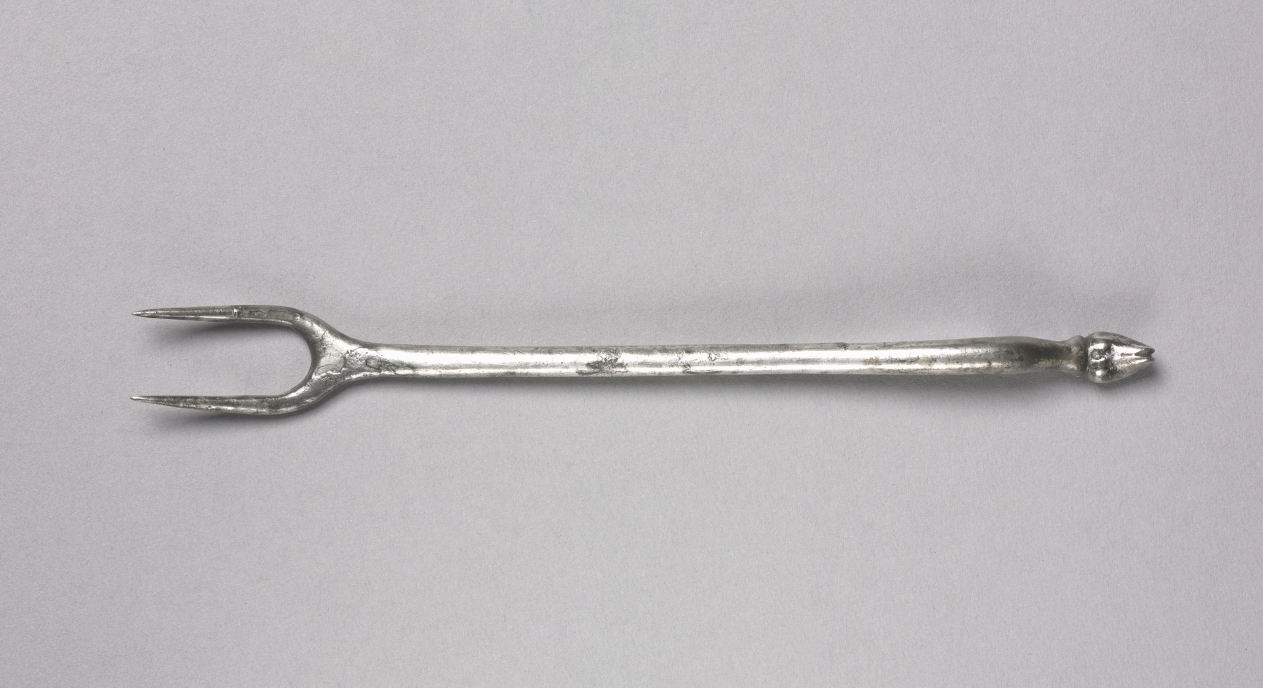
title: Fork with Animal Hoof Finial (Ornament)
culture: Byzantium, Syria(?), Byzantine period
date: 300s CE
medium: silver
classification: Metalwork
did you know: In the 10th century, forks like this one were common in Byzantium. During this same period in Western Europe, people usually ate with their fingers, thinking that forks were decadent.